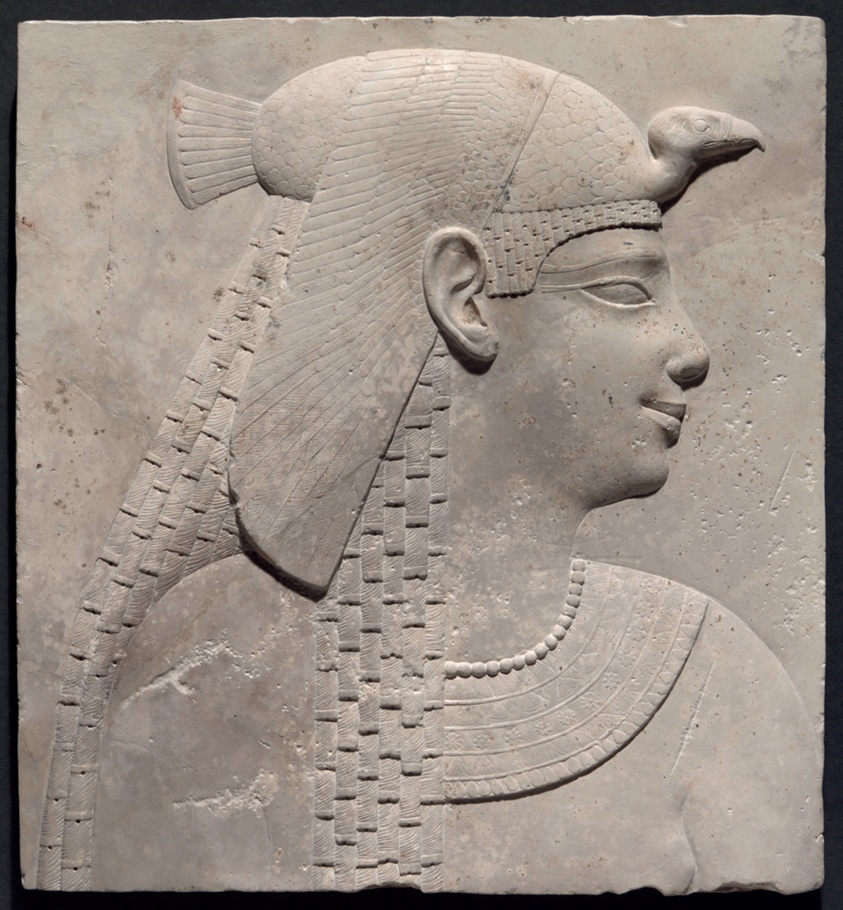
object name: Architectural fragment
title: Plaque Depicting a Queen or Goddess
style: ptolemaic, greco-roman (egyptian), ancient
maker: Egyptian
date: Ptolemaic Period (332–30 BCE)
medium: Limestone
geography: Egypt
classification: plaque (flat object); stone; sculpture; ancient art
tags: goddesses